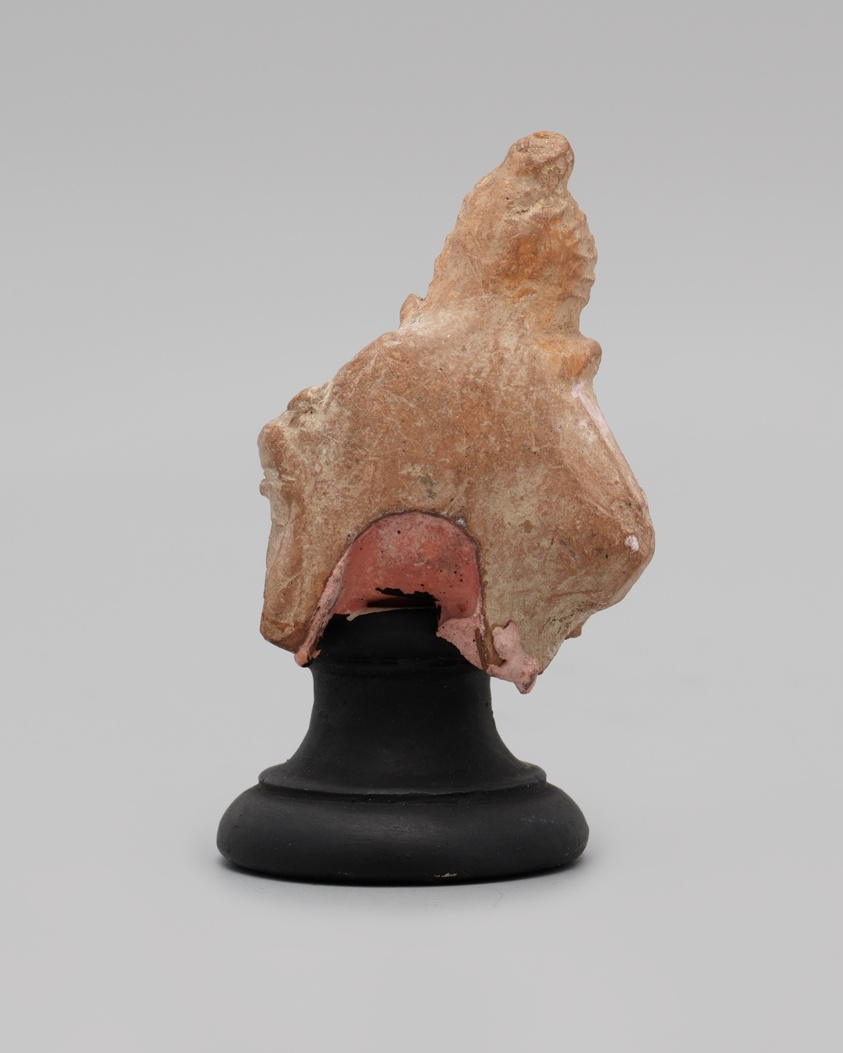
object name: Sculpture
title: Torso of a Child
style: greek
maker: Greek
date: 2nd-1st century BCE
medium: terracotta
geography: Greece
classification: earthenware; ceramics; sculpture; ancient art